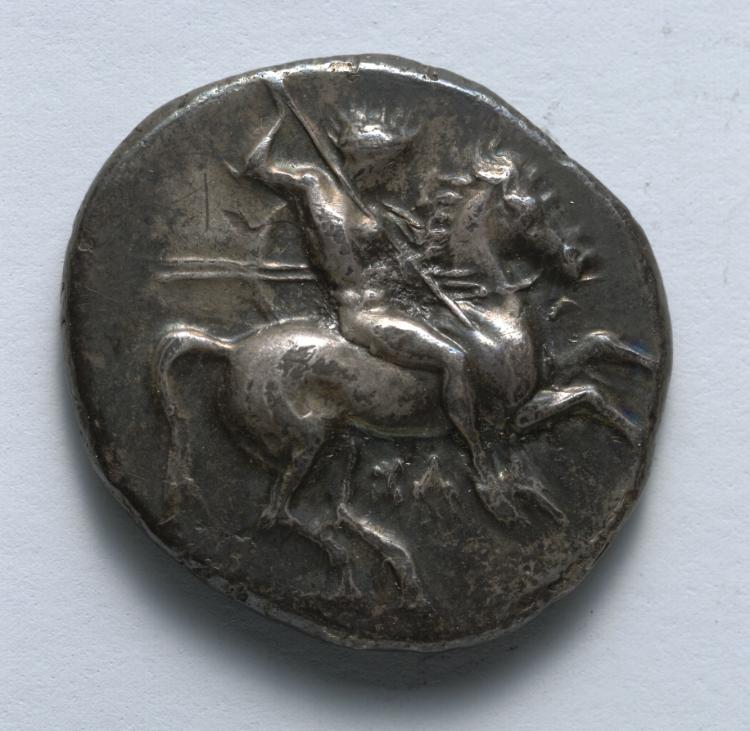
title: Stater: Nude Warrior on Horseback (obverse)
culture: Greek, minted at Taras (South Italy)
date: 334–302 BCE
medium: silver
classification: Coins